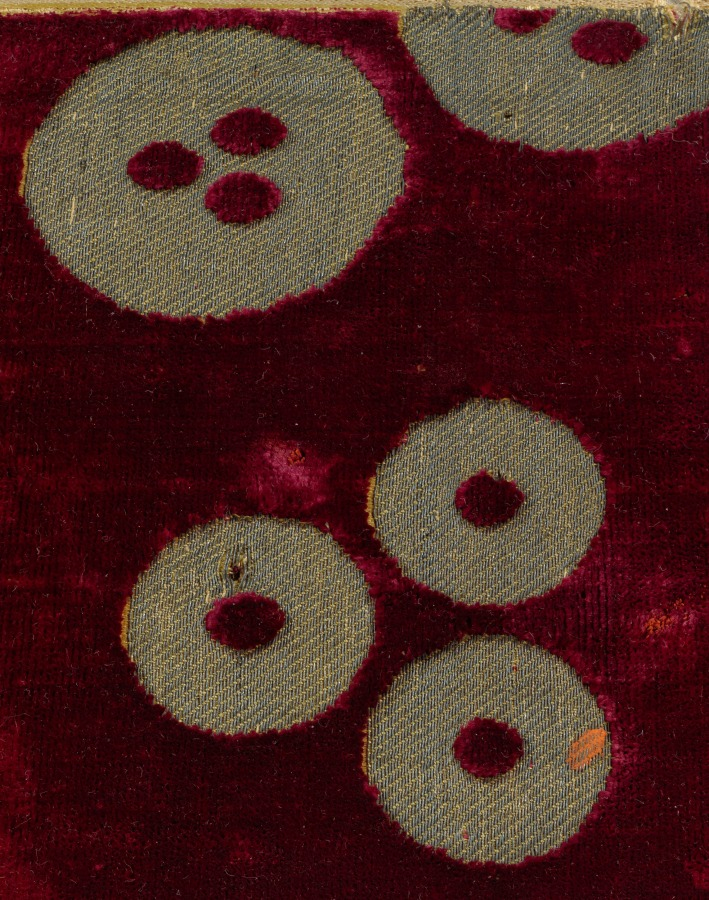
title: Brocaded velvet with chintamani design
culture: Turkey, Bursa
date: late 1400s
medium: velvet, brocaded: silk and silver-metal thread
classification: Velvet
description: This early Ottoman brocaded velvet was woven in an imperial workshop in the prosperous city of Bursa, the silk capital and major commercial center of the Ottoman Empire. It has exceptionally rich crimson silk pile, almost twice as dense as later monochrome velvets. The brocaded pattern of three balls and paired wavy bands is known as chintamani, derived from the Sanskrit word for a popular Buddhist motif, “the three jewels,” shown surrounded by flames or foliage in Buddhist art across Asia. Based on the high frequency of its use in art for the Islamic court of the Ottoman Turks, it appears to have been a favored motif and possibly even an unofficial imperial emblem.